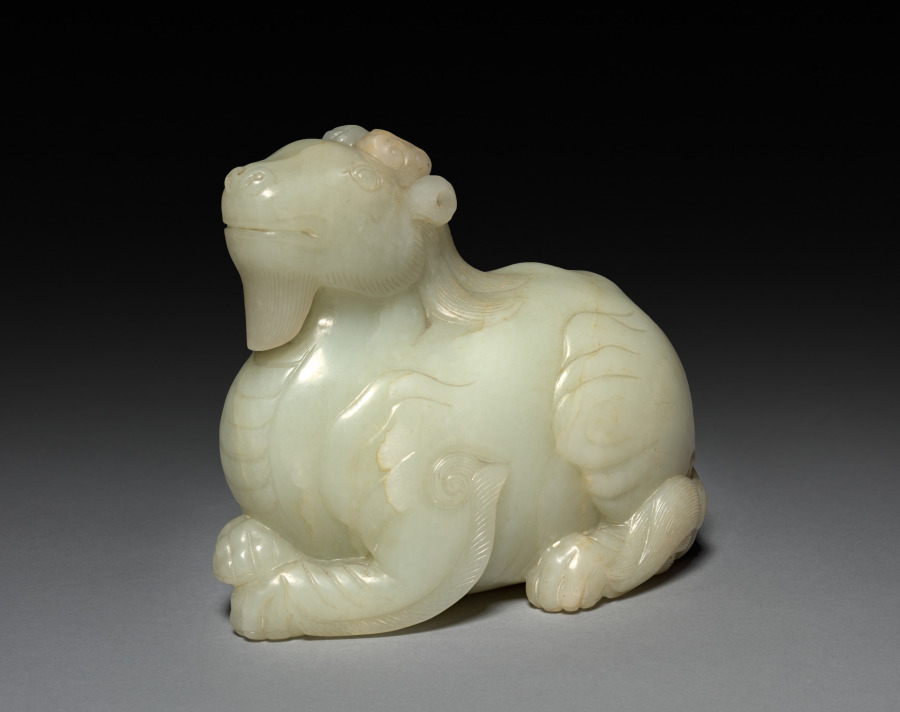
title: Fantastic Animal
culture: China, Qing dynasty (1644-1911)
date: 1700s–1800s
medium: jade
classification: Jade